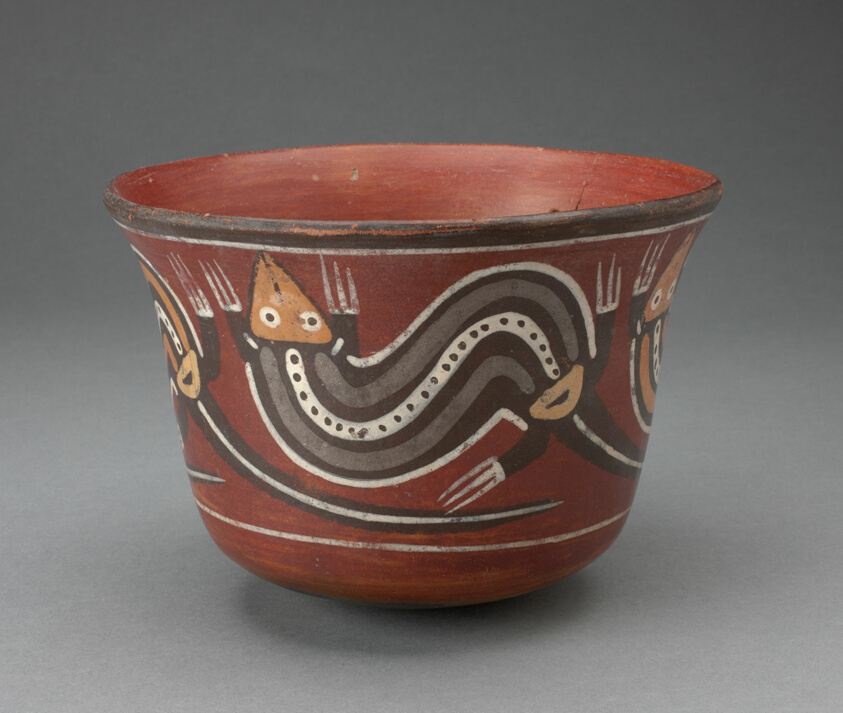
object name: Vessel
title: Cup Depicting Abstract Lizards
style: nazca, early intermediate period, Pre-Columbian, americas, Arts of the Americas, andean, andes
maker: Nazca; South coast, Peru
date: 180 BCE–500 CE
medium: Ceramic and pigment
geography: Nazca Valley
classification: earthenware; art of the americas; ceramics; vessel